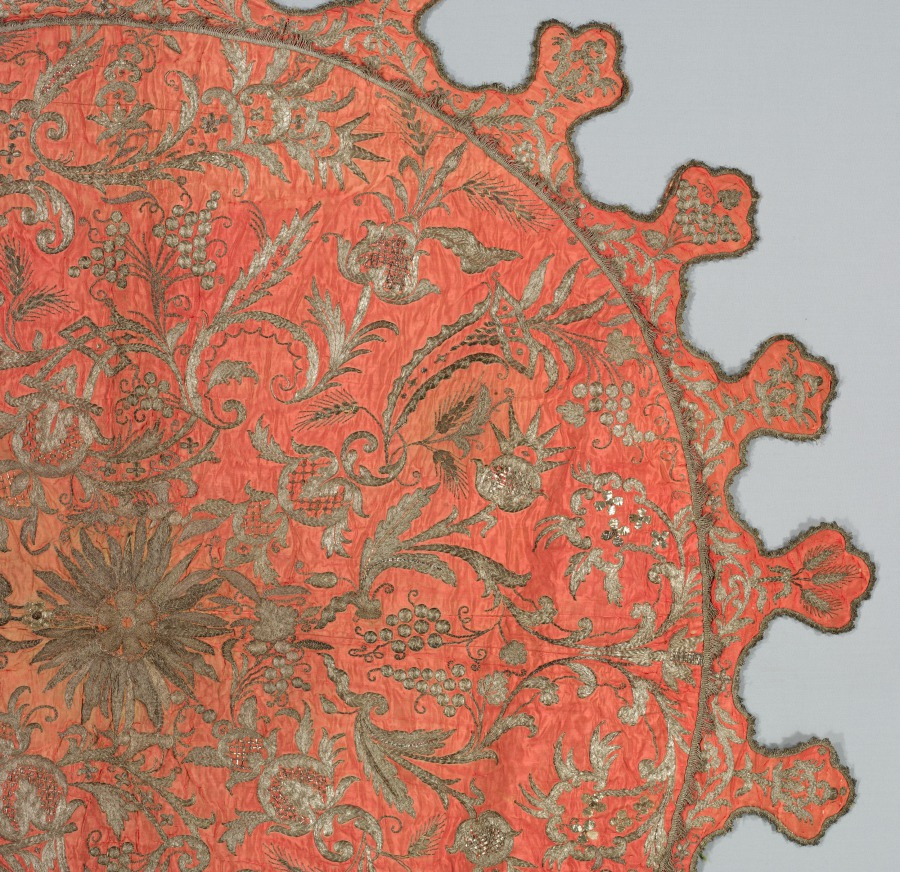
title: Parasol Top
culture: France, 18th century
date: 1700s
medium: embroidery; silver metallic thread and silk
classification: Embroidery